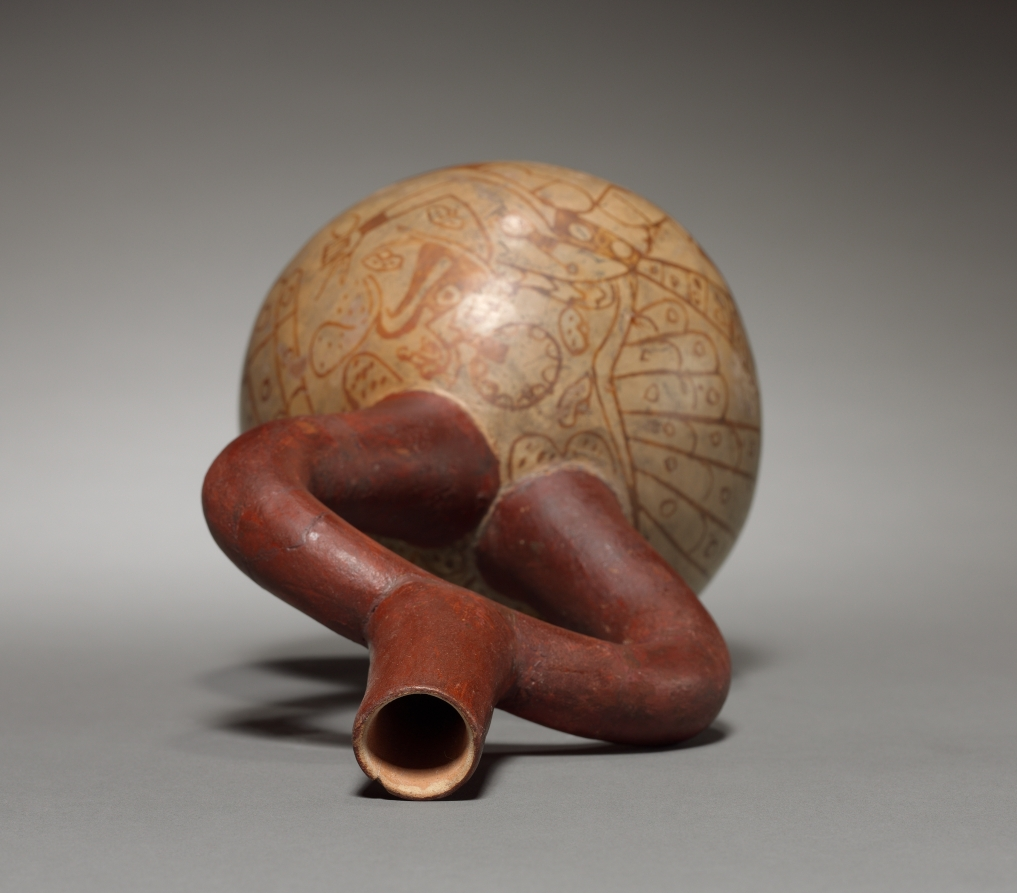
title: Bottle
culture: Peru, Chimú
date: c. 200–400 CE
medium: pottery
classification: Ceramic